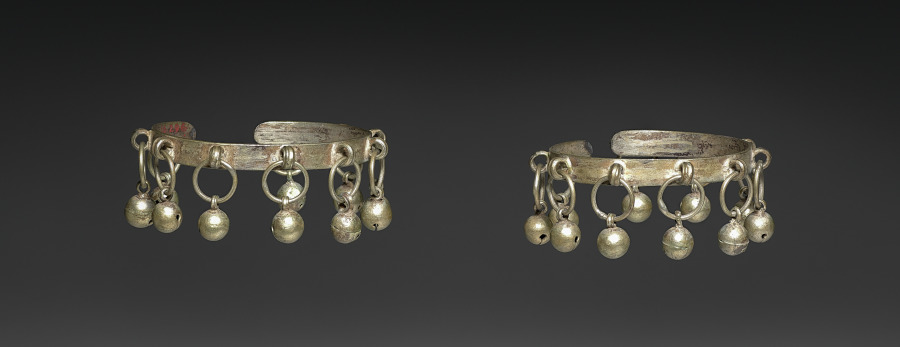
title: Wristlets or Anklets for Children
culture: India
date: 1800s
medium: silver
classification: Jewelry